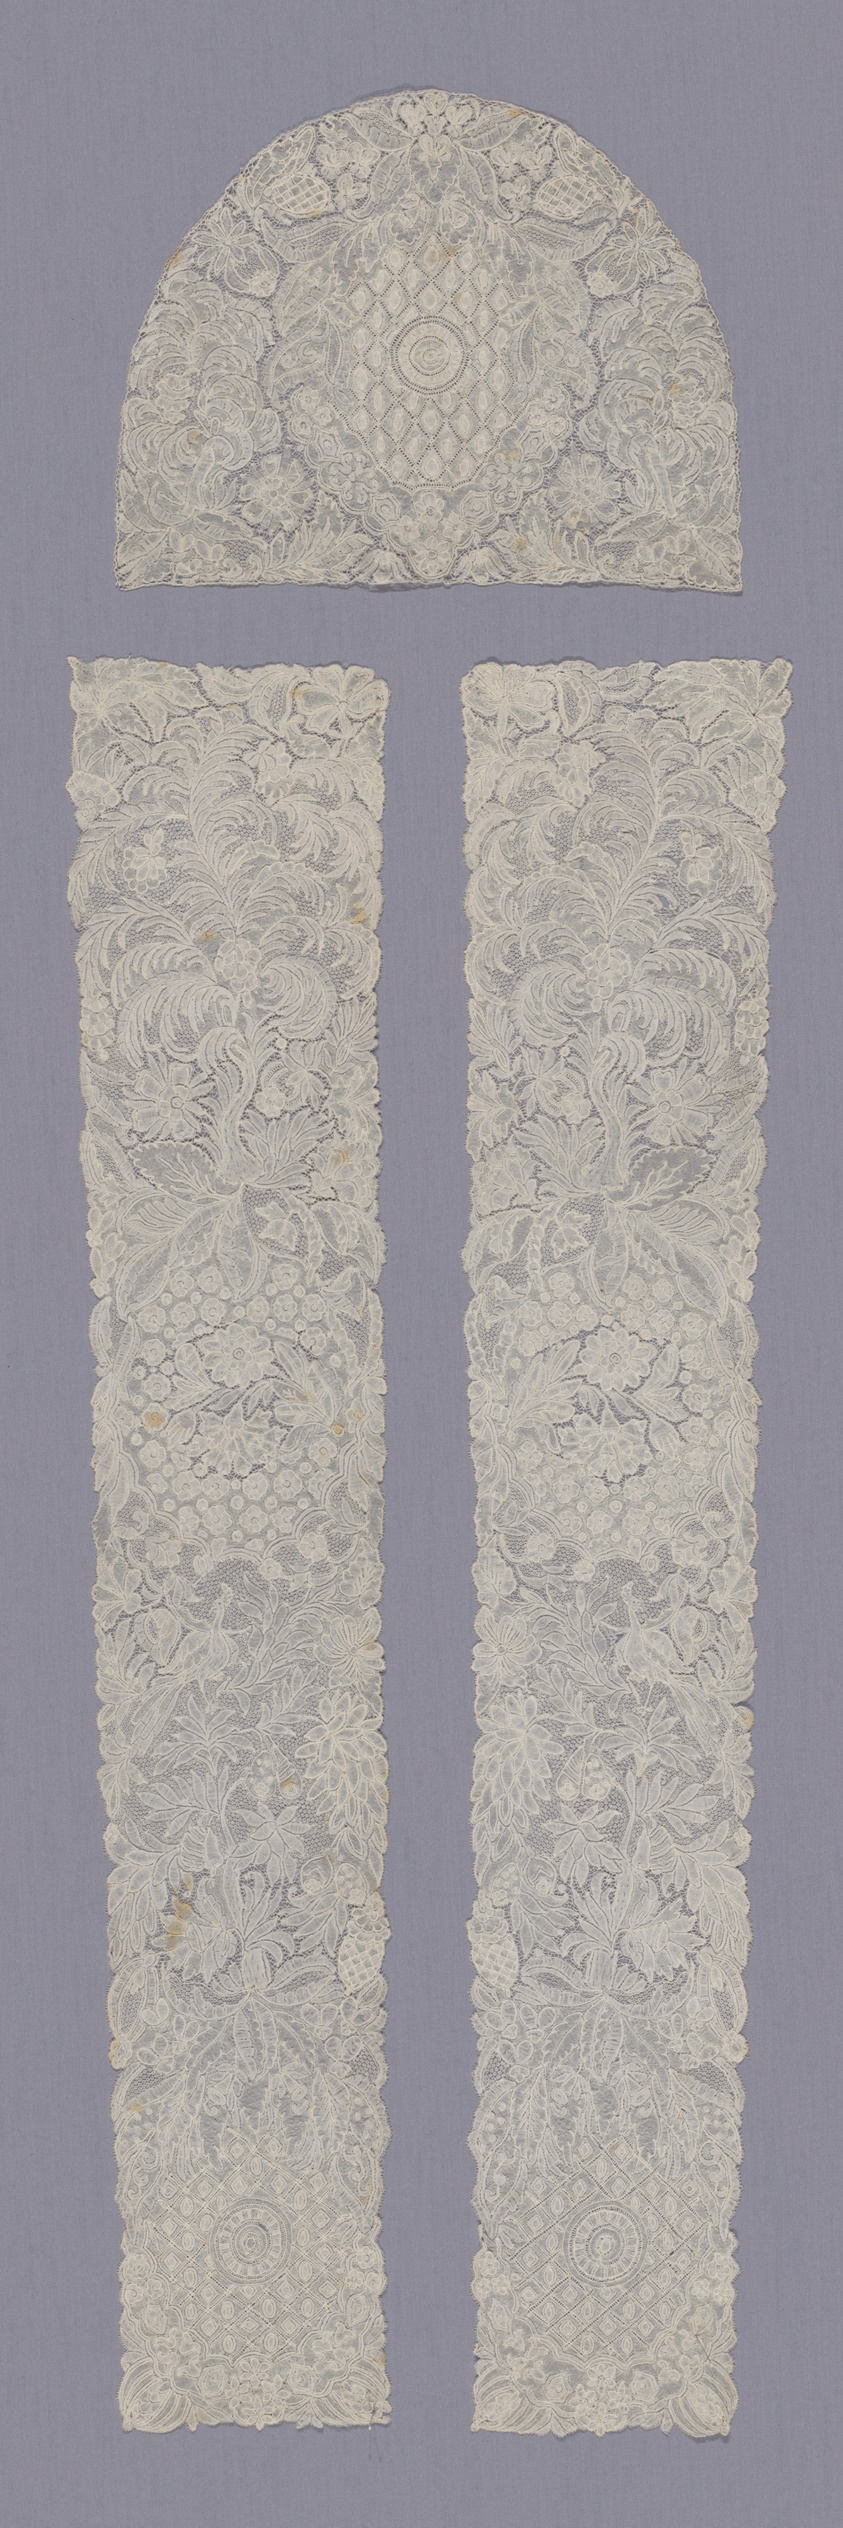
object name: Costume and Accessories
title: Cap Crown and a Pair of Lappets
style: 18th Century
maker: Flanders, Brussels (modern day Belgium)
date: 1720s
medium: Linen, bobbin part lace of a type known as "Brussels"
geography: Flanders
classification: costume accessory; lace - bobbin; lace; textile; costume - lace; costume accessory - headdress; costume accessory worn above the waist; headdress; costume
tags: floral motifs, diamond shapes, flowers, foliage